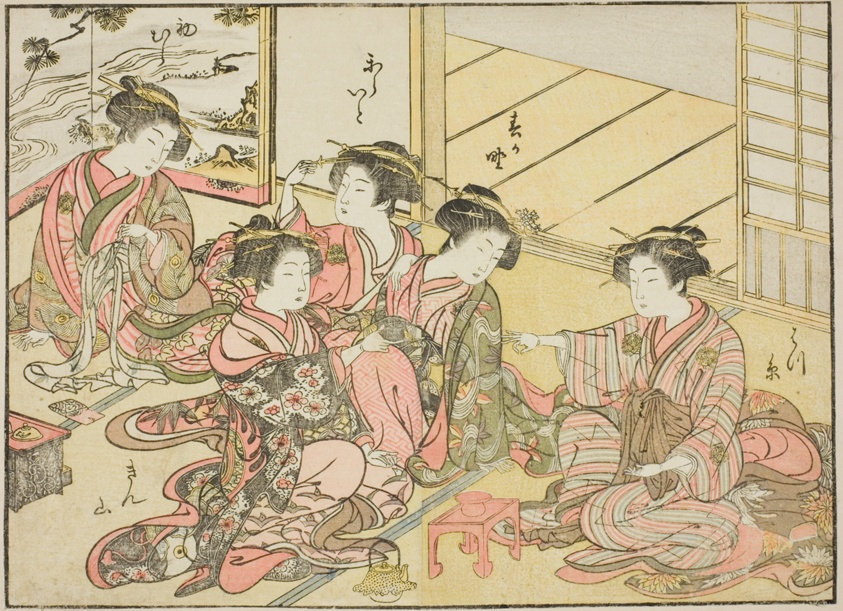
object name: Print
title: Courtesans of the Gakuiseya, from the book "Mirror of Beautiful Women of the Pleasure Quarters (Seiro bijin awase sugata kagami)," vol. 1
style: Japanese (culture or style)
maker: Katsukawa Shunsho; Japanese, 1726-1792; Kitao Shigemasa; Japanese, 1739-1820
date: 1776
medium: Color woodblock print; double-page illustration cut from a book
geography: Japan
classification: print; asian art